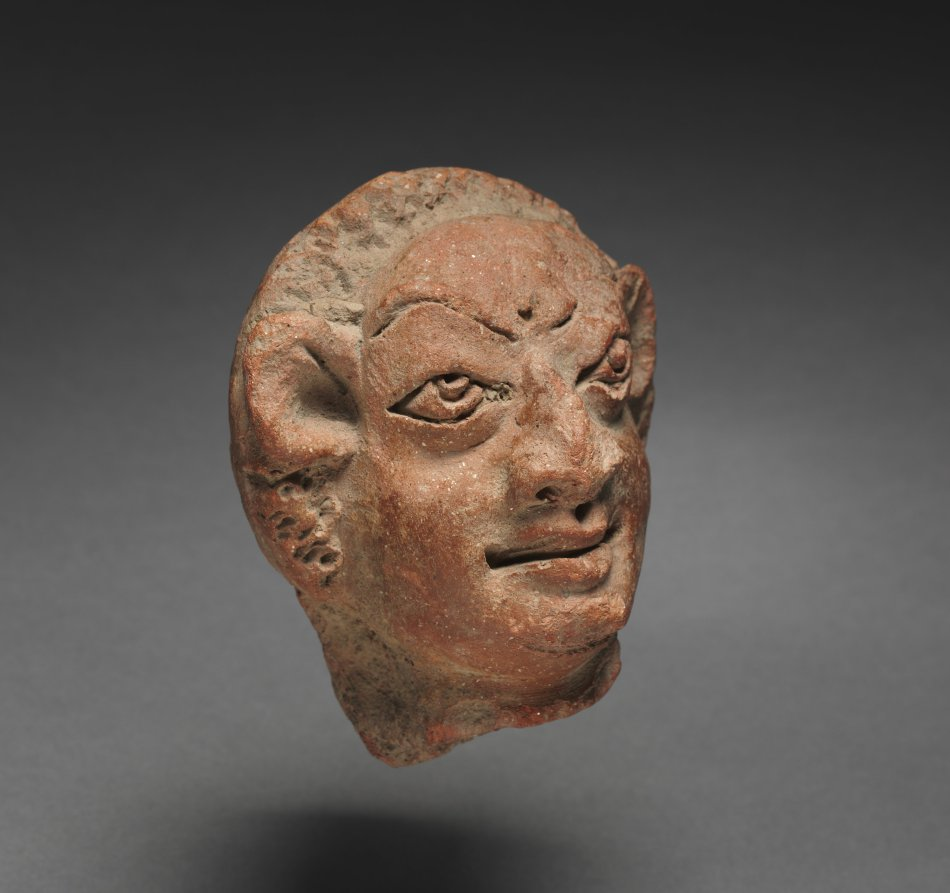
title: Grotesque Male Head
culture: India, Gupta period (320–647)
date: c. 400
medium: terracotta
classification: Sculpture